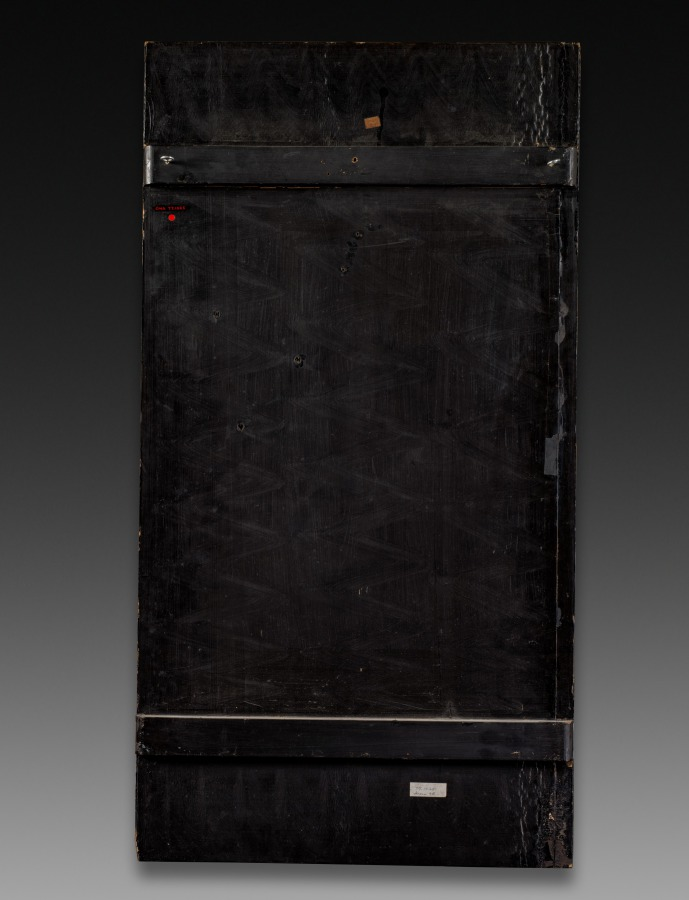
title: Decorative Panel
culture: Japan, Edo period (1615–1868) to Meiji period (1868–1912)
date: 1800s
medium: lacquer with ivory inlays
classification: Lacquer